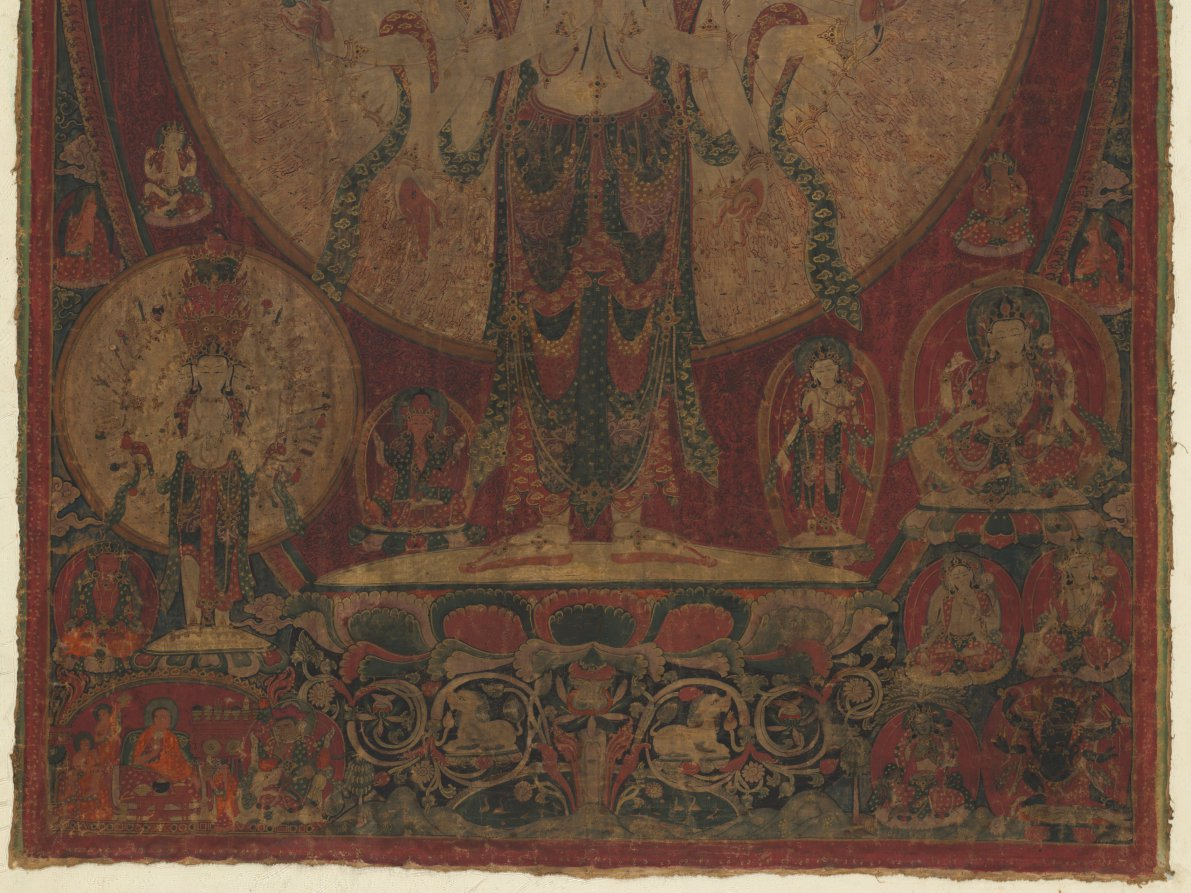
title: Eleven-Headed, Thousand-Armed Bodhisattva of Compassion (Avalokiteshvara)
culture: Western Tibet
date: c. 1500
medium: Gum tempera and ink on cotton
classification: Painting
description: One thousand arms surround the central figure like a radiating halo. Each hand has an eye in the palm to see the suffering of all beings, generating the sense of compassion that this figure embodies. The special form of the central image of the bodhisattva Avalokiteshvara derives from the mystic vision of a nun named Gelongma Palmo, who was born a Kashmiri princess, but prayed for leprosy to avoid having to marry and became an accomplished nun. While meditating in a cave, she achieved this vision of 11-headed, 1,000-armed Avalokiteshvara, who cured her leprosy and guided her on the path to enlightenment.